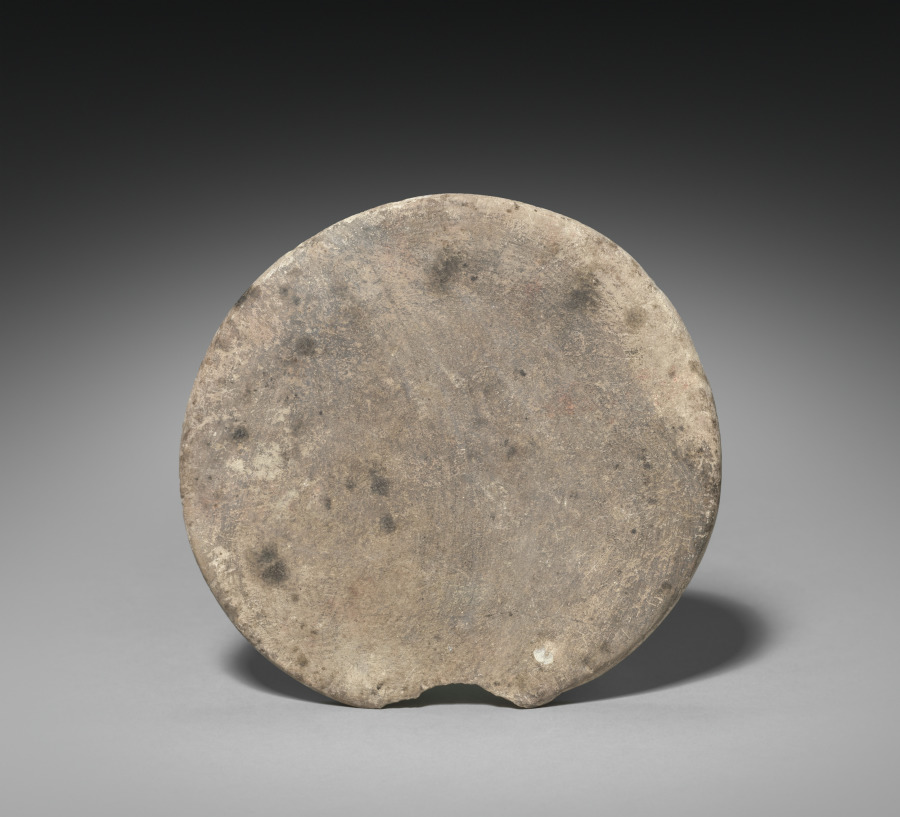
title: Shawabty Jar with Lid (lid)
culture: Egypt, New Kingdom (1540–1069 BCE), Dynasties 19–20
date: 1295–1069 BCE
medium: Nile silt ware; lid of limestone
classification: Funerary Equipment